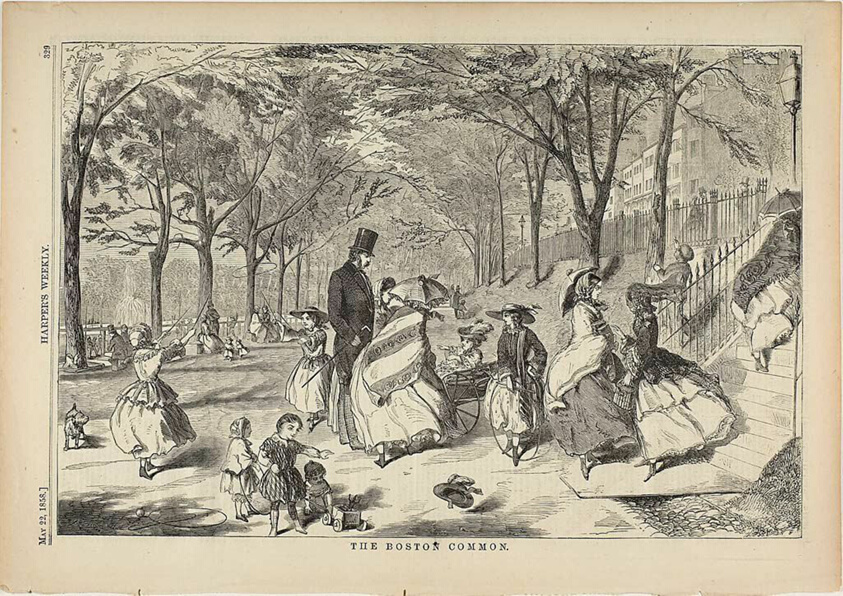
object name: Print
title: The Boston Common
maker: Winslow Homer (American, 1836-1910); published by Harper's Weekly (American, 1857-1916)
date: published May 22, 1858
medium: Wood engraving on paper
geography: United States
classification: wood engraving; print; prints and drawing